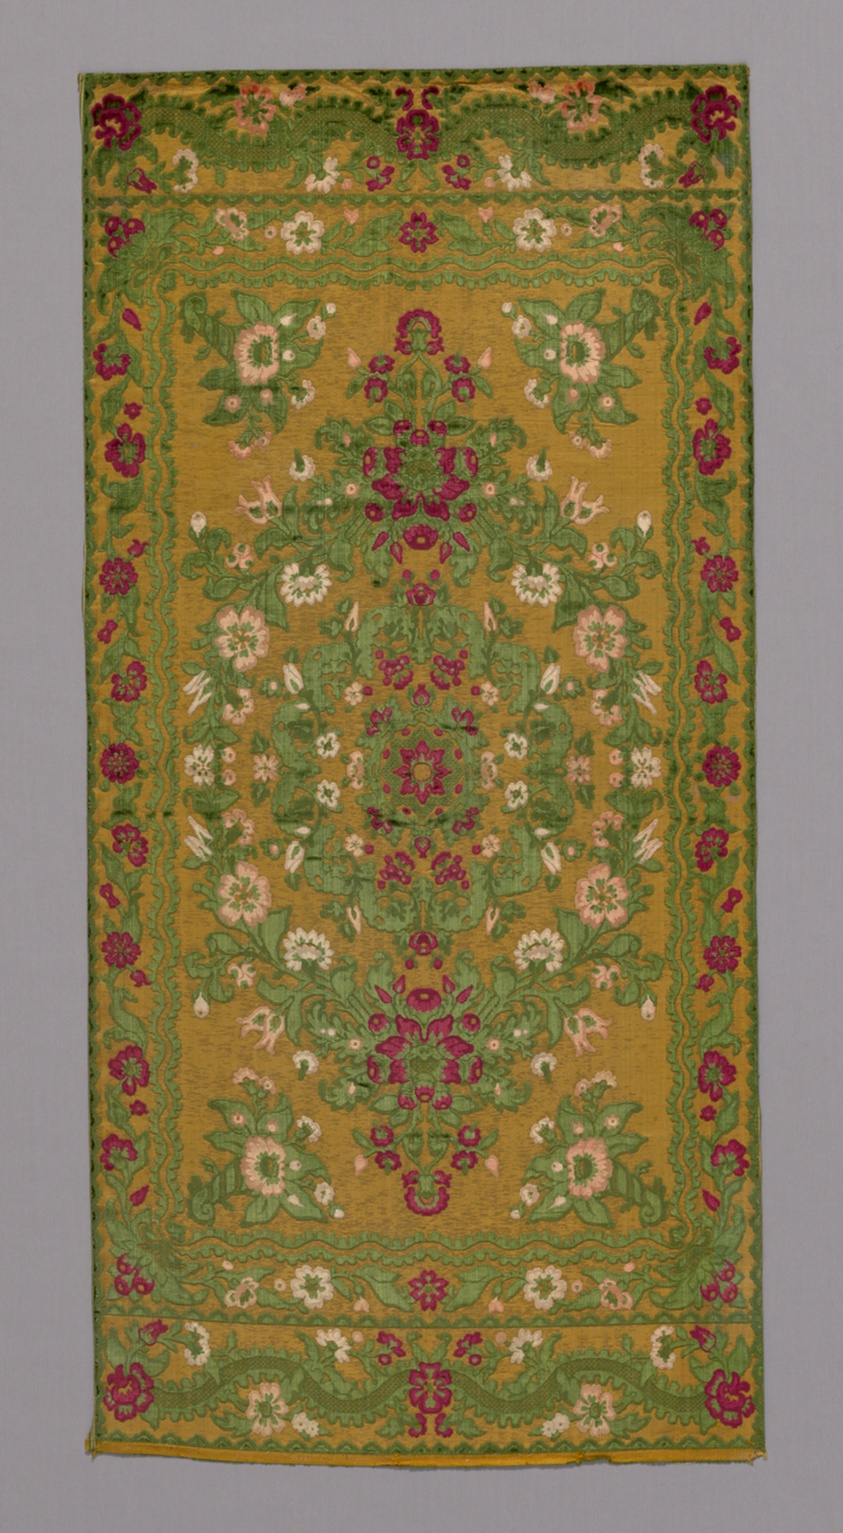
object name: Textile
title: Panel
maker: Turkey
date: 17th century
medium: Silk and gilt-metal strip, warp-float faced broken warp chevron twill weave with supplementary facing wefts and two-color supplementary pile warps forming cut and uncut voided velvet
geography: Turkey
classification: textile; weaving - velvet